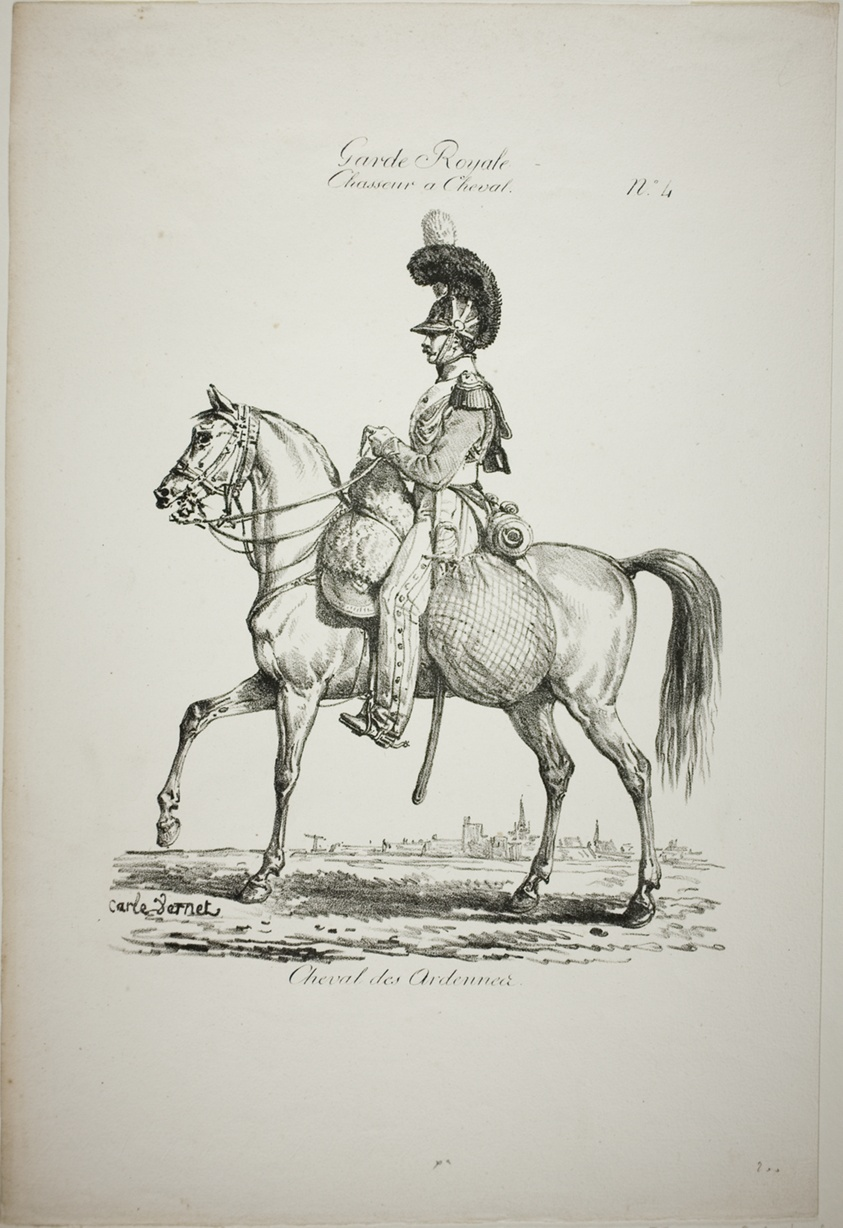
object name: Print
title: Royal Guard, Norman Mounted Light Infantryman and Horse, No. 4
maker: Carle Vernet (French, 1758-1836); printed by Comte de Charles Philibert Lasteyrie du Saillant (French, 1759-1849)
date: c. 1818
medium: Lithograph in black on ivory wove paper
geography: France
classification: lithograph; print; prints and drawing